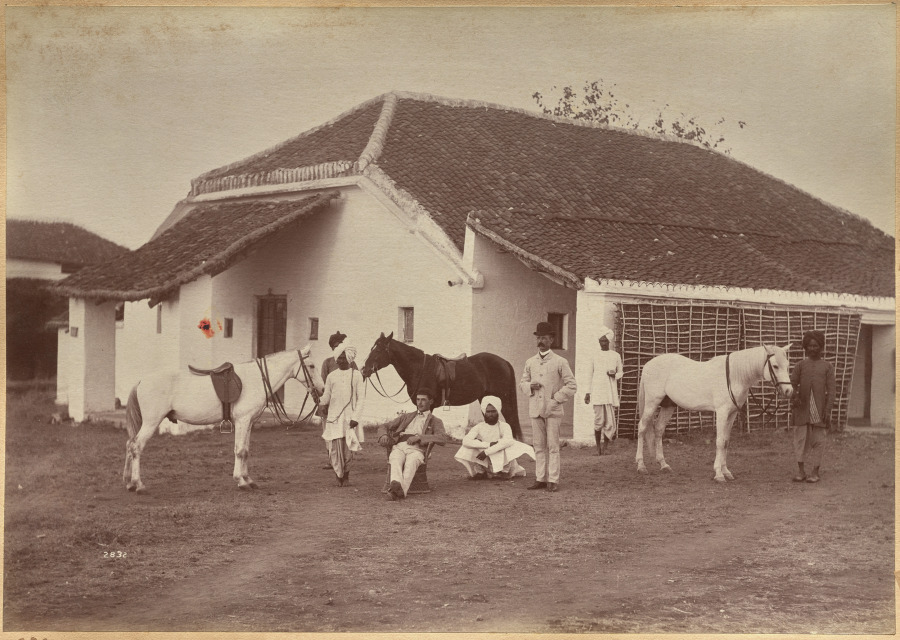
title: Captain Harris and Ruston, Jhansi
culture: India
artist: Raja Deen Dayal (Indian, 1844–1905)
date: c. 1882–87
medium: albumen print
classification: Photograph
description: These photographs are part of an album, now disassembled, of around 105 photographs taken in India between 1885 and summer 1887 that provide glimpses into the lives of the British colonial elite and royal and upper-class Indians. The museum holds another group of 37 pictures from this album (2016.266), which was probably commissioned by a British civil servant visiting or working in India around 1888 as a personal souvenir of his experiences there.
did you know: Raja Deen Dayal is regarded now, and was considered during his lifetime, to be India’s most important 19th-century photographer.